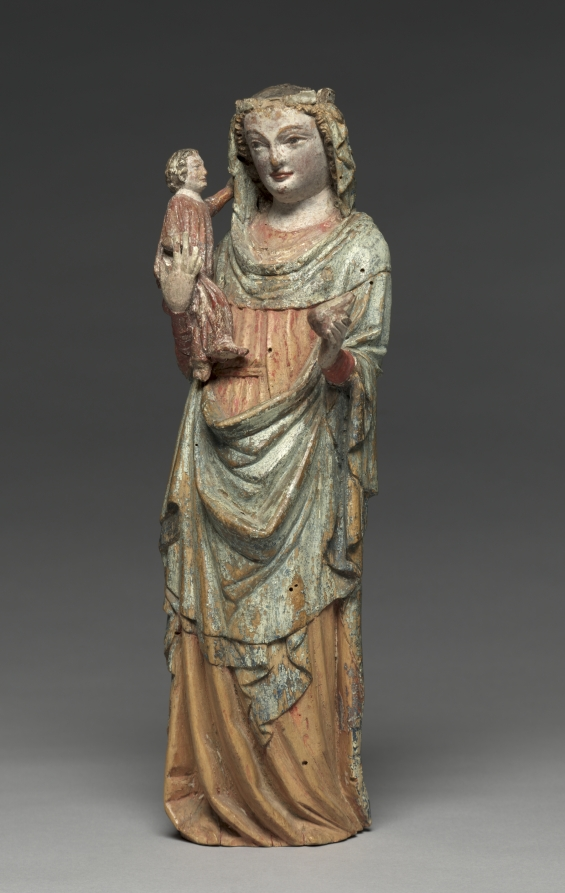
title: Reliquary Statuette of the Virgin and Child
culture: Austria, Salzburg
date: c. 1330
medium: painted lindenwood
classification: Sculpture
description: A small rectangular cavity in the back of this sculpture reveals that it was originally made to serve as a reliquary (a container for relics). In her left hand the Virgin holds a pear, a symbol of the peace and love of Christ.